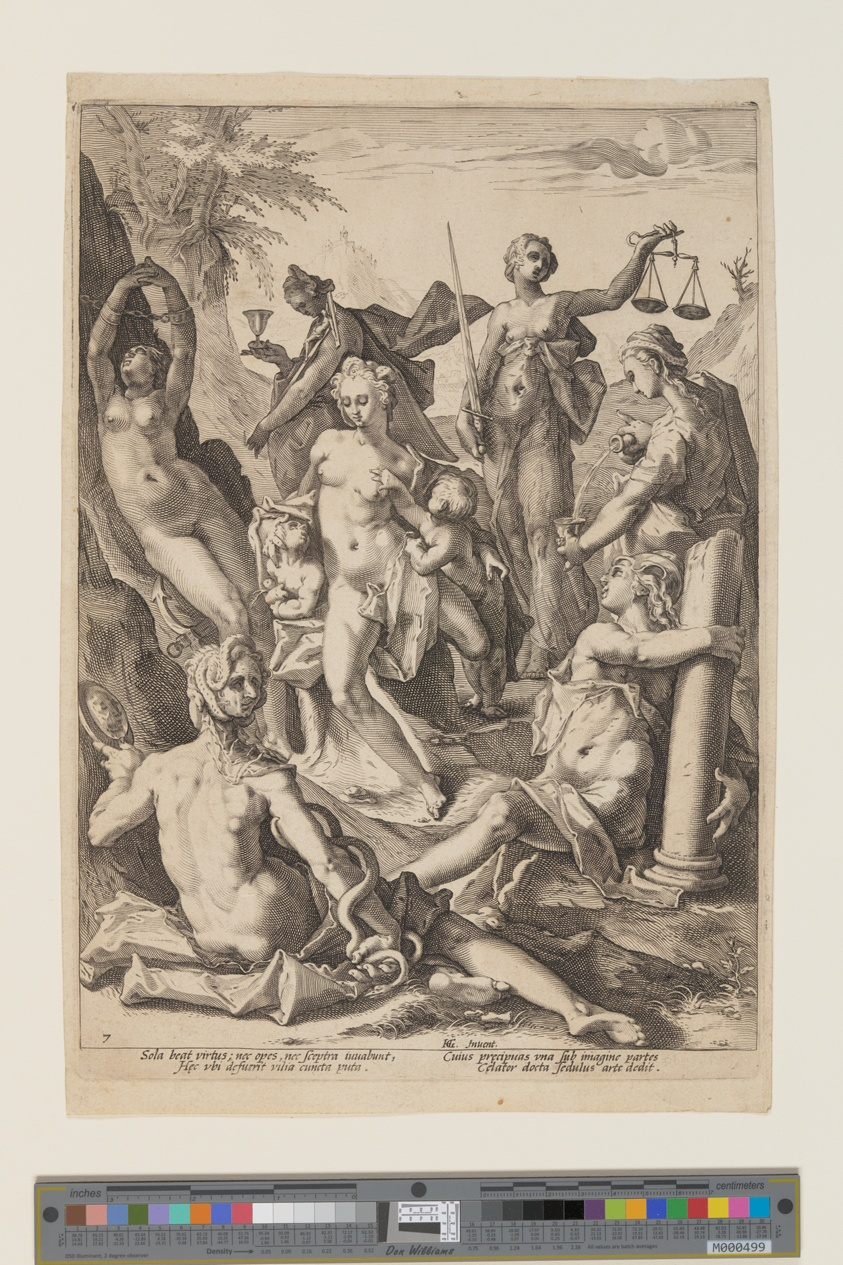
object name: Print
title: The Seven Virtues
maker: Jacob Matham (Dutch, 1571–1631); after Hendrick Goltzius (Dutch, 1558–1617)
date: c. 1600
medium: Engraving on ivory laid paper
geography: Netherlands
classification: print; paper; prints and drawing; engraving